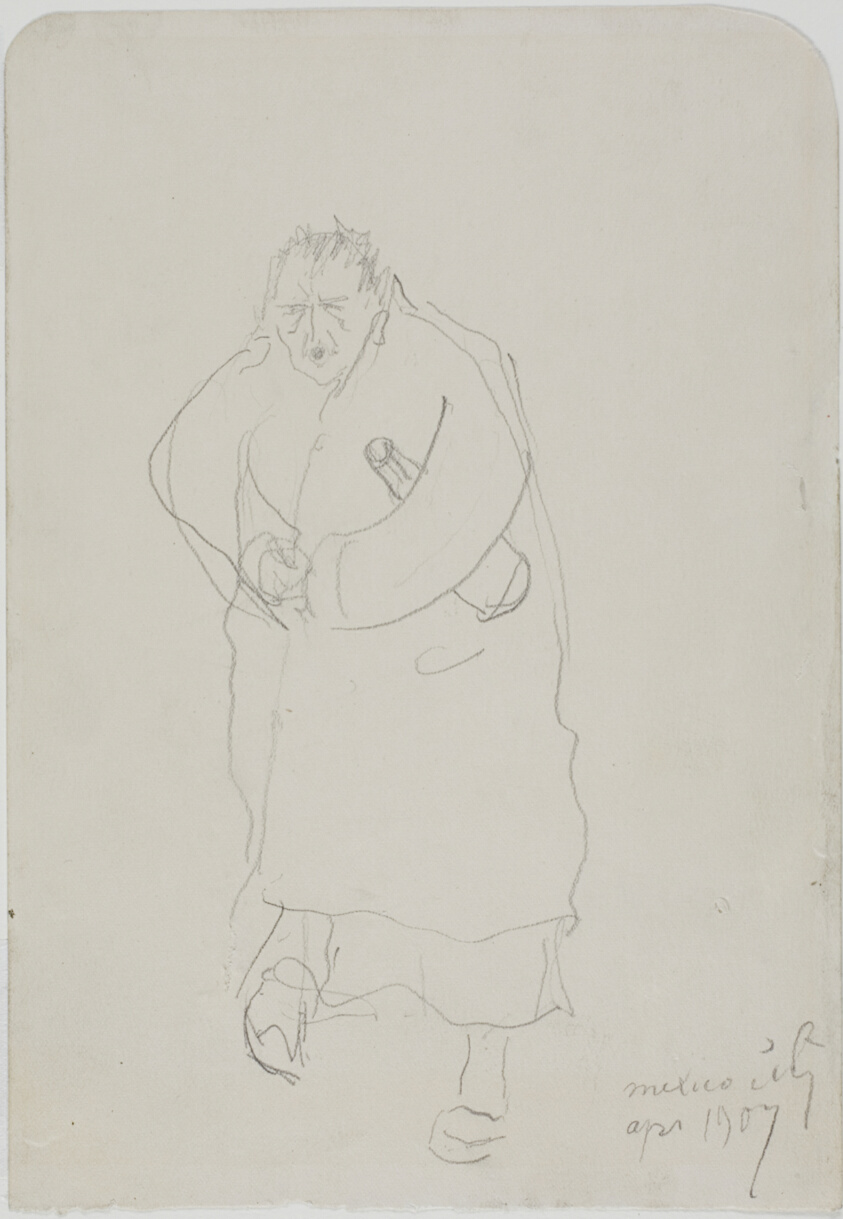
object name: Drawing and Watercolor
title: Self-Portrait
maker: Anders Zorn (Swedish, 1860-1920)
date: 1907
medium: Graphite on cream wove paper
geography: Sweden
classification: graphite; drawings (visual works); prints and drawing